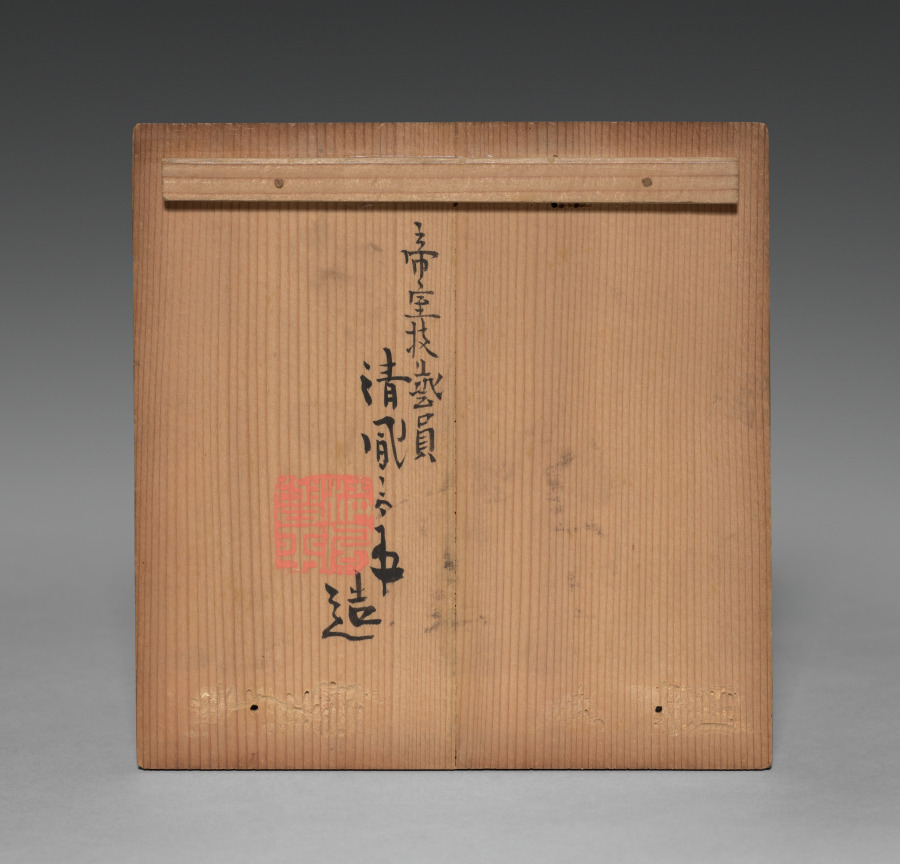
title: Gu-Shaped Flower Vase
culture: Japan, Meiji period (1868–1912)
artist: Seifū Yohei III (Japanese, 1851–1914)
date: 1893–97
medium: Glazed porcelain with molded and carved designs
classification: Ceramic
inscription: 大日本清風造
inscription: This gu-shaped vase has “cherry blossom glaze” (ōkayū), according to the inscription on its box.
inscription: A label affixed to the side of the box gives a sense of how previous owners conceived of the piece. Although the label is partially abraded, one can make out the character nezu 鼠, used in the names of numerous light pinks, from Naniwa pink (Osaka pink) to Miyako pink (Kyoto, or capital, pink). Also legible is the phrase hakugōrai, a broad term that can describe a shade of white associated with ceramics discovered in Korean tombs, but often applied to other ceramics of similar coloration, many from Chinese kilns, including Ding (J. Tei) ware of the Northern Song dynasty.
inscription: 清風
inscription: 帝室技芸員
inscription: 清風與平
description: Seifū Yohei III was the most prominent head of a ceramics studio in Kyoto that specialized in Chinese-style porcelains and especially items for use in sencha (煎茶), or the drinking of steeped-leaf tea with companions. Sencha was popular among the bunjin of Kyoto and Osaka, who often enjoyed it as part of their emulation of Chinese culture. While sencha was by design less formal than the Japanese tea ceremony, it still featured the display of treasured objects. Prized Chinese antiquities were generally unobtainable, so substitutes such as the Gu-Shaped Flower Vase were much in demand.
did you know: This gu-shaped vase has “cherry blossom glaze” (ōkayū), which Yohei III invented in 1890.